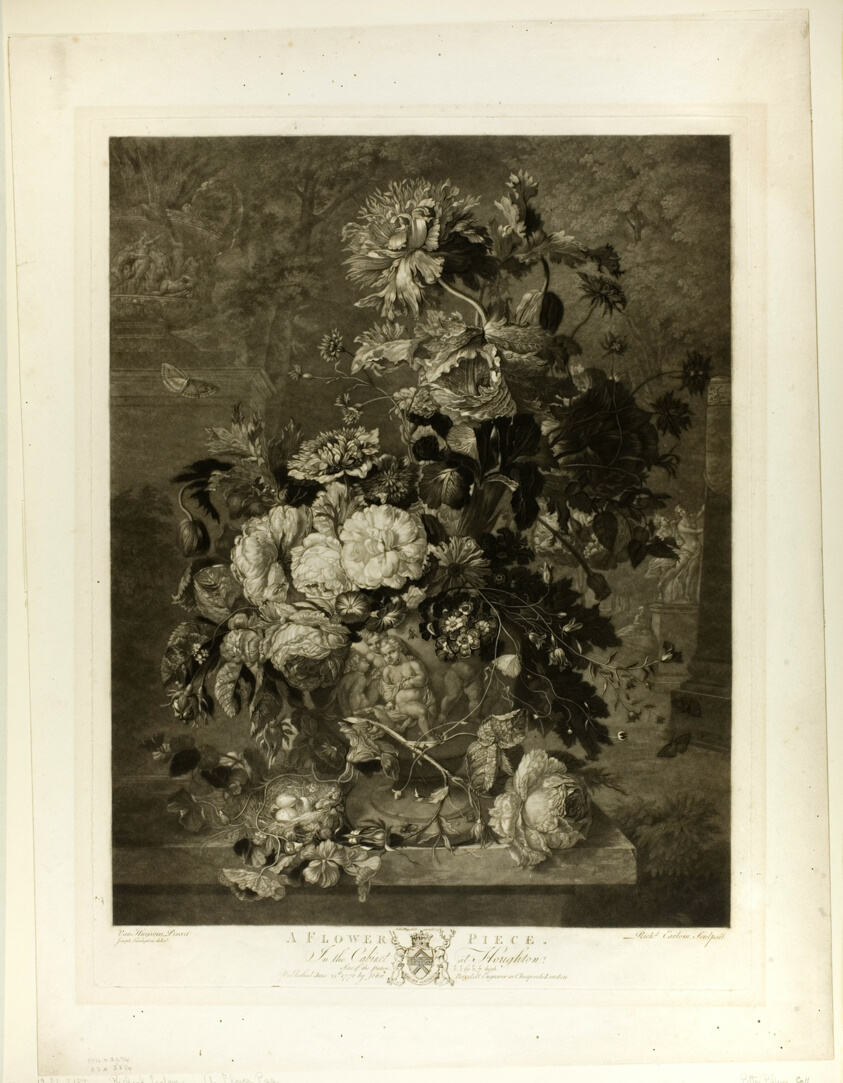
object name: Print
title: A Flower Piece, from The Houghton Gallery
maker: Richard Earlom (British, 1743-1822); after Jan van Huysum (Dutch, 1682-1749)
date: 1778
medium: Mezzotint with etching, with engraved inscription, in black on ivory wove paper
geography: England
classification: mezzotint; print; prints and drawing